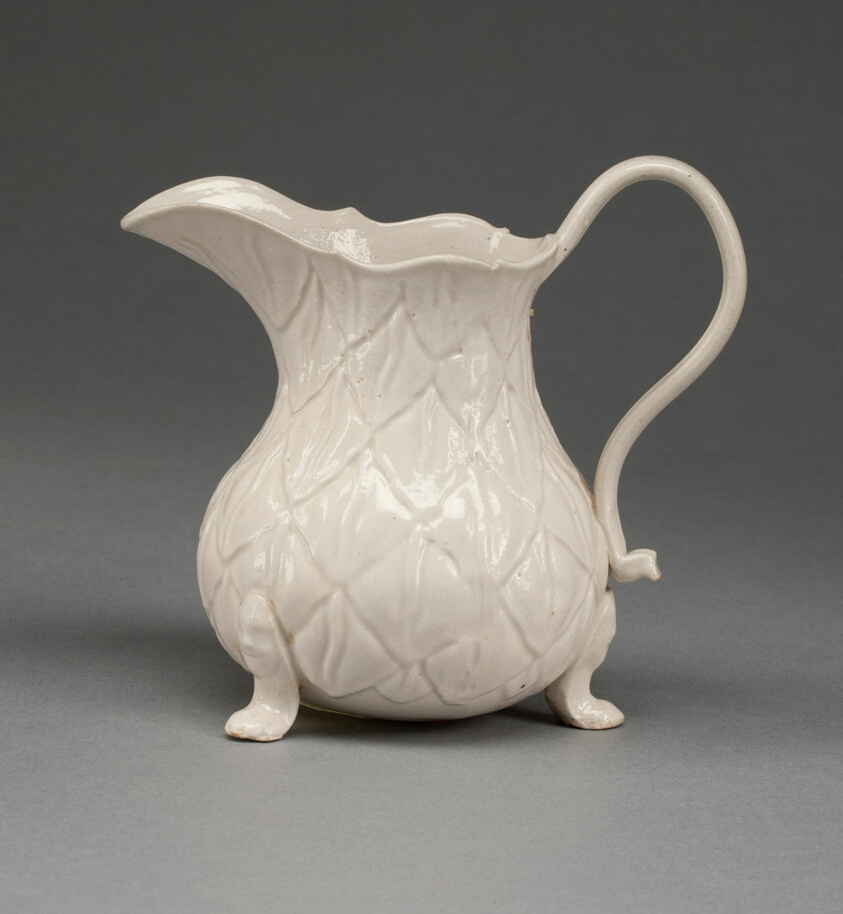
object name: Ceramics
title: Cream Jug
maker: Staffordshire, England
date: 1750/59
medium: Salt-glazed stoneware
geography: Staffordshire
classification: stoneware; salt-glazed stoneware; ceramics; european decorative arts